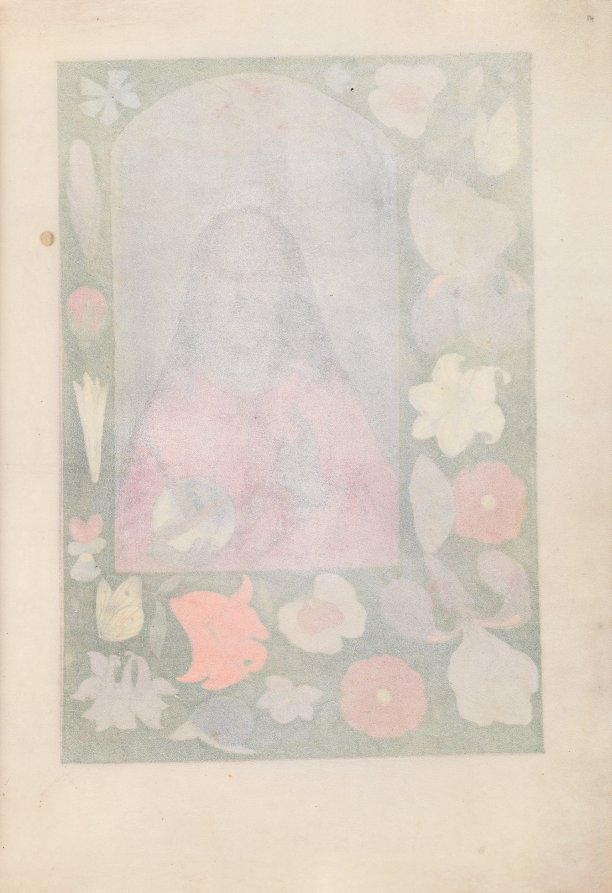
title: Hours of Queen Isabella the Catholic, Queen of Spain: Fol. 14r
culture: Flanders, Ghent and Bruges, late 15th century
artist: Master of the First Prayerbook of Maximillian (Flemish, c. 1444–1519)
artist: and Associates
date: c. 1500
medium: ink, tempera, and gold on vellum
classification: Bound Volume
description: This manuscript was illuminated by a circle of at least five highly organized manuscript painters active in the Flemish cities of Ghent and Bruges. The principal illuminator was Alexander Bening, who painted the majority of the book's miniatures. Manuscripts produced by this circle of artists are renowned for the decoration of their borders, which typically feature a rich variety of realistically-painted flowers, birds, and butterflies. This prayer book, called a book of hours, was intended not for a cleric, but for the private devotions of a lay person-in this case, Isabella the Catholic, Queen of Spain (1451-1504). Isabella's coat of arms embellishes the book's frontispiece. It is unlikely that the book was commissioned by the Queen herself; rather, she probably received it as a diplomatic gift from someone courting her patronage, perhaps Cardinal Francisco Jimenez de Cisneros. A Franciscan friar, Jimenez was dependent upon Isabella for his advancement, first to the post of Queen's confessor in 1492, and then to Archbishop of Toledo in 1495.